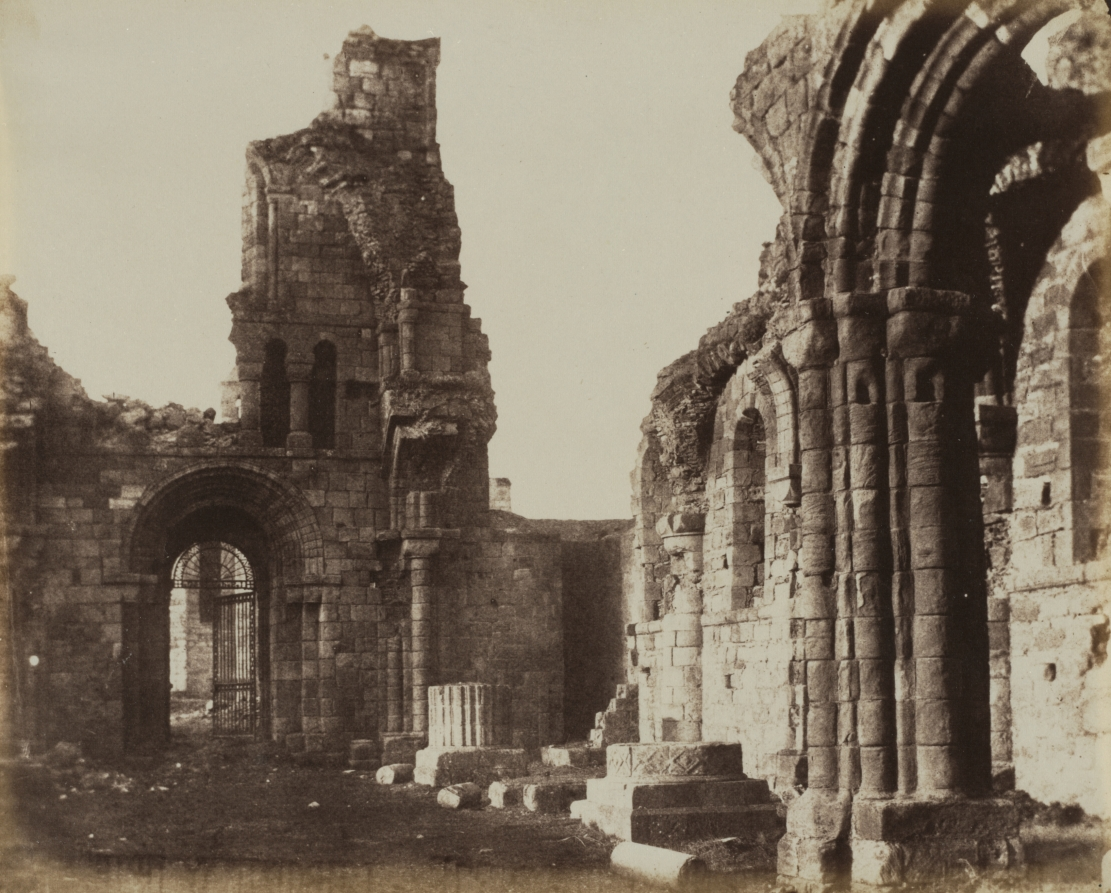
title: Lindisfarne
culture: England, 19th century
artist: Robert Henry Cheney (British, 1800–1866)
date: c. 1853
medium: albumen print from calotype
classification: Photograph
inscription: Written in ink on recto of mount: "Lindisfarne"